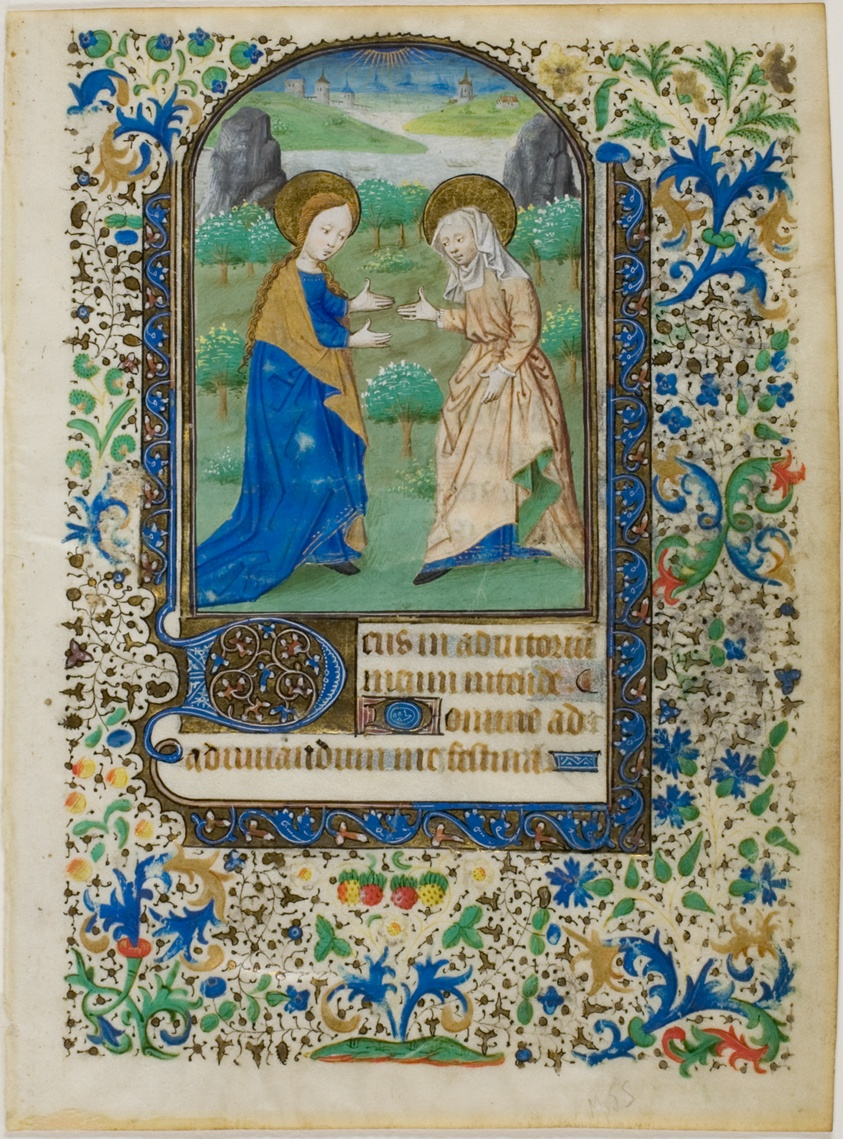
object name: Drawing and Watercolor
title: The Visitation, from a Book of Hours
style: medieval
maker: French (possibly Paris or Brittany)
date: 1440s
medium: Manuscript cutting with decorations in tempera and gold leaf, and littera textualis inscriptions in brown ink, ruled in light brown wash, on parchment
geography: France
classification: tempera; manuscript; drawings (visual works); prints and drawing